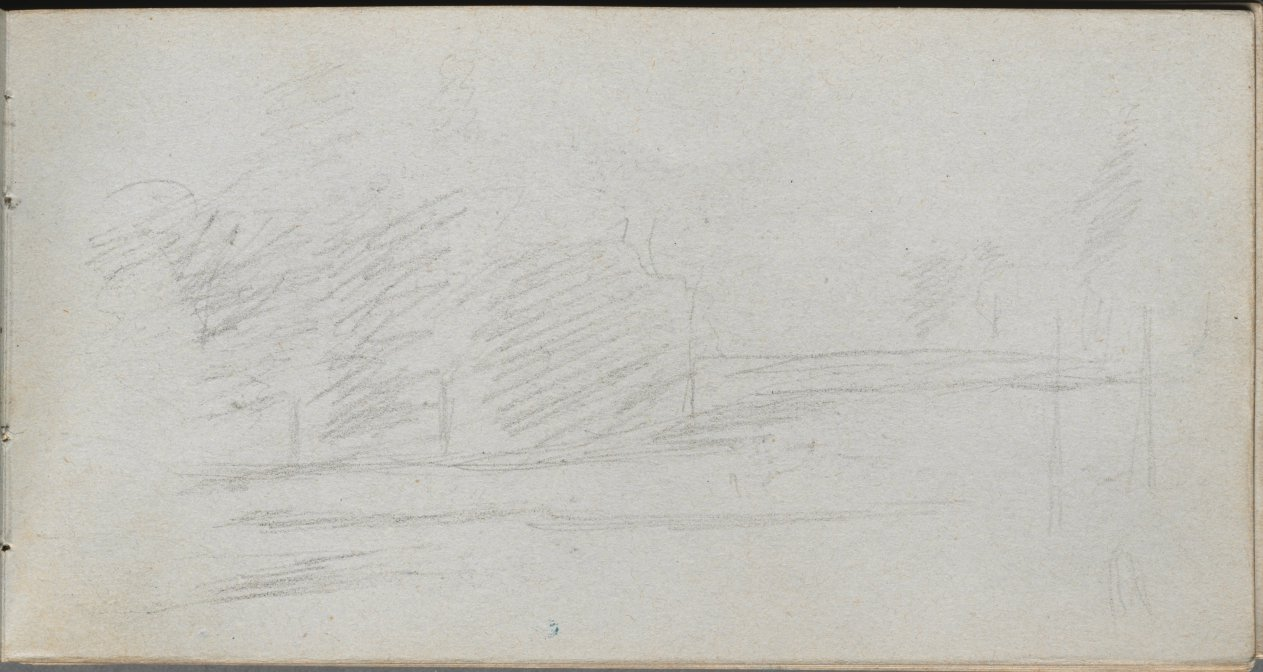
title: Sketchbook, page 78: Landscape Study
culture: France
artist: Ernest Meissonier (French, 1815–1891)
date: c. 1860s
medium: graphite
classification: Bound Volume